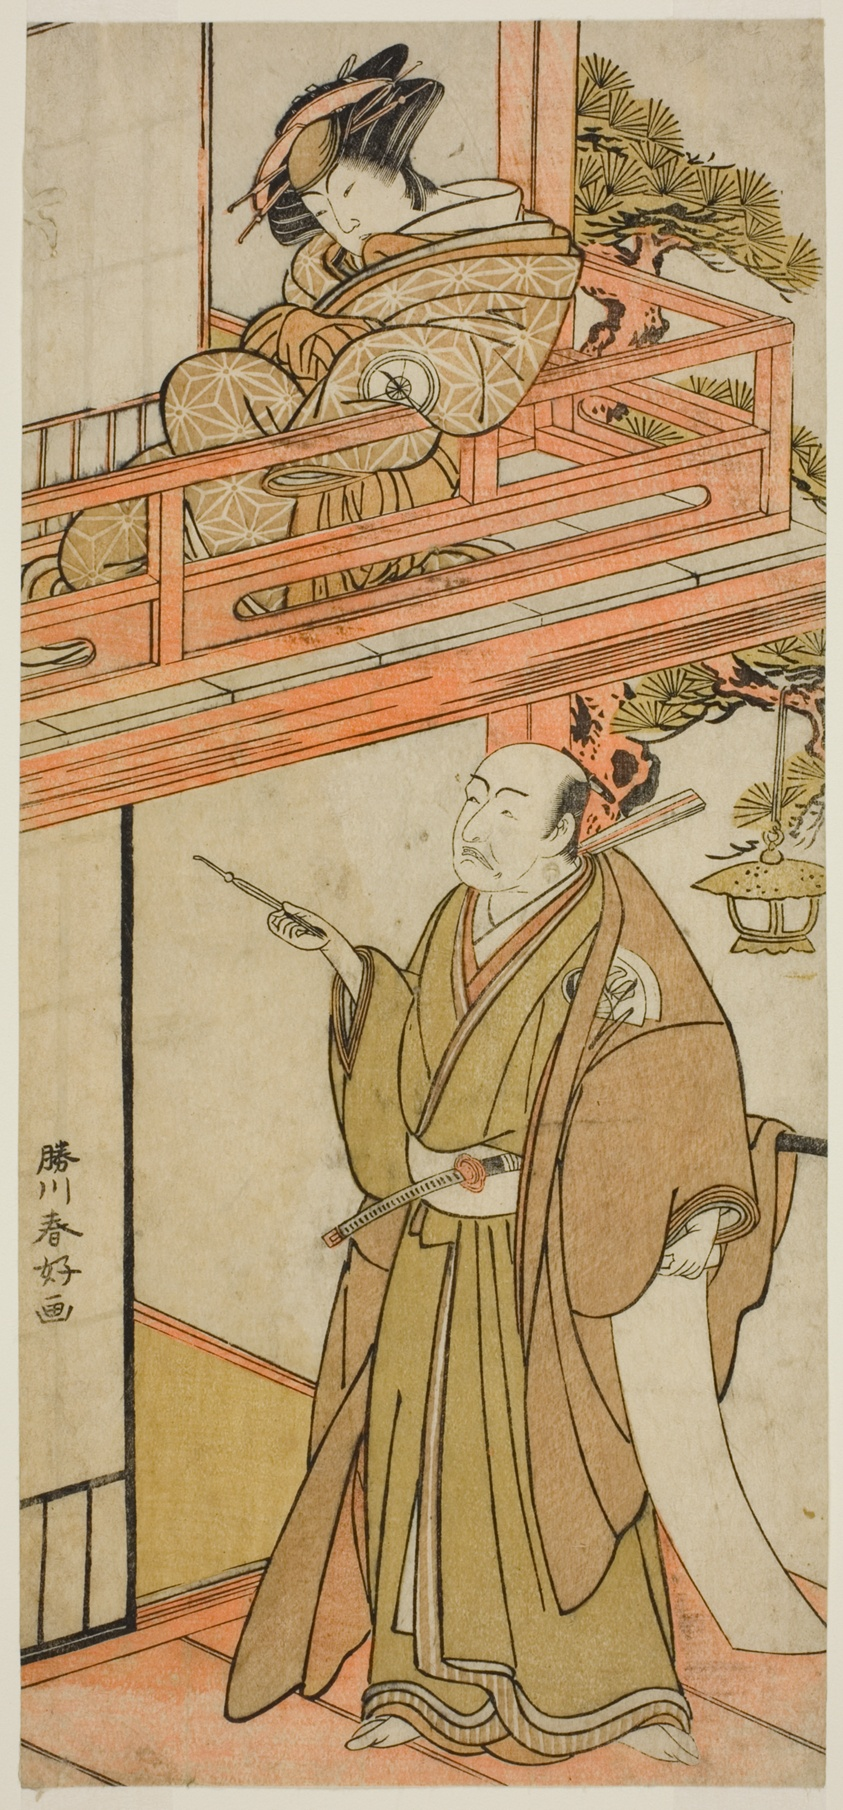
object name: Print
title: The Actors Iwai Hanshiro IV as Okaru and Onoe Kikugoro I (?) as Yuranosuke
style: Japanese (culture or style)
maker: Katsukawa Shunko I; Japanese, 1743–1812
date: late 18th century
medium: Color woodblock print; hosoban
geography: Japan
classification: woodblock print; print; asian art